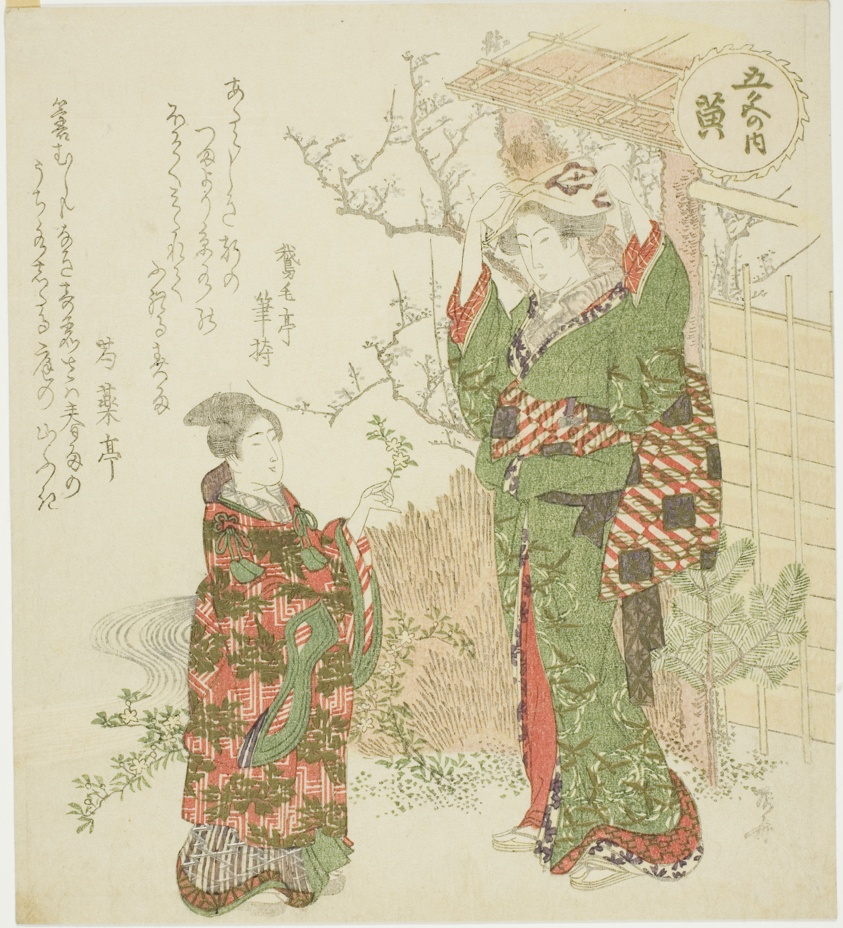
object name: Print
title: Yellow (Ki), from the series "Five Colors (Goshiki no uchi)"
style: Japanese (culture or style)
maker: Ryuryukyo Shinsai (Japanese, c. 1764-1820)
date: c. 1820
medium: Color woodblock print; shikishiban, surimono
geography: Japan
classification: woodblock print; print; asian art